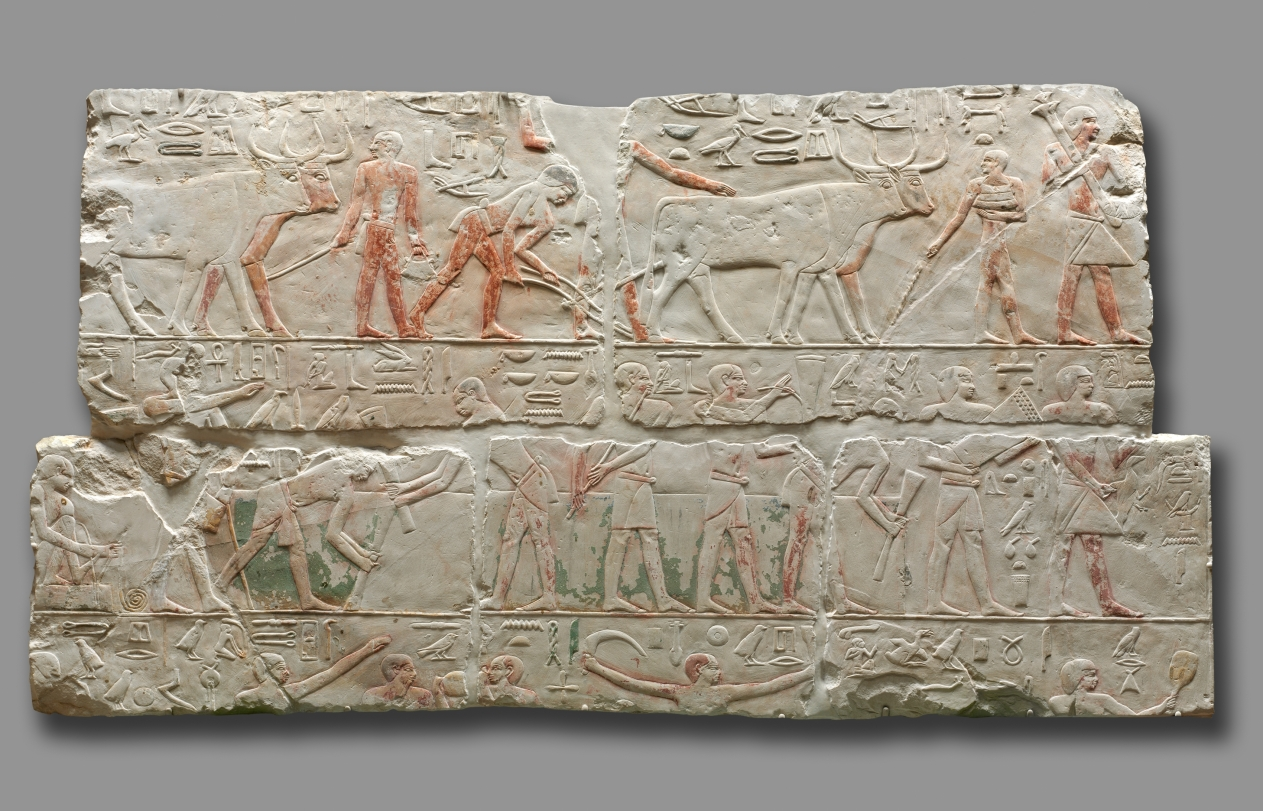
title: Relief of Agricultural Scenes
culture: Egypt, Saqqara, Old Kingdom (2647–2124 BCE), Dynasty 6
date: c. 2311–2281 BCE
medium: painted limestone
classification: Sculpture